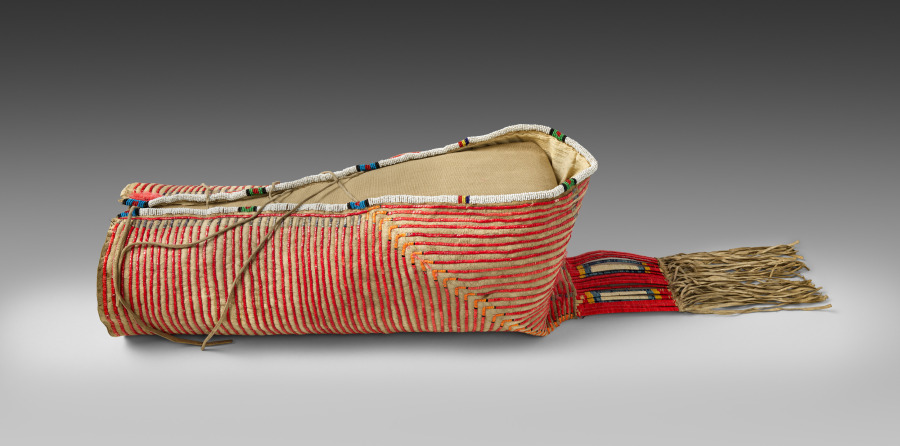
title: Cradle Board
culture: America, Native North American, Lakota (Sioux), Post-Contact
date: c. 1900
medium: leather, quills, beads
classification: Leather